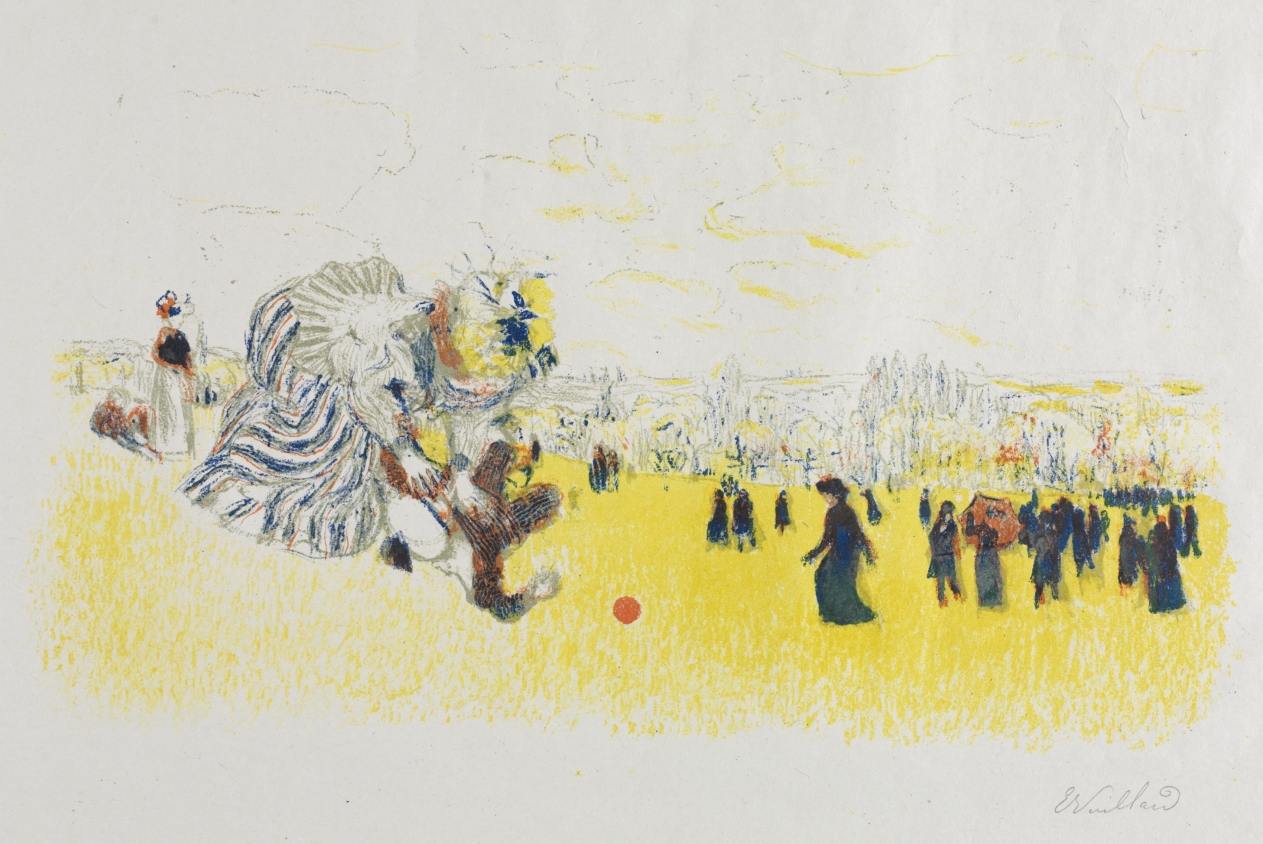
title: Children's Games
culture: France, 19th century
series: Album des Peintres-Graveurs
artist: Édouard Vuillard (French, 1868–1940)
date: 1897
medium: color lithograph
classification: Print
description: This enigmatic image portrays a mother attending to her child who is sprawled on the ground in a public park. The monumental size of the pair compared with other visitors to the park is characteristic of the artist’s manipulation of scale and perspective.